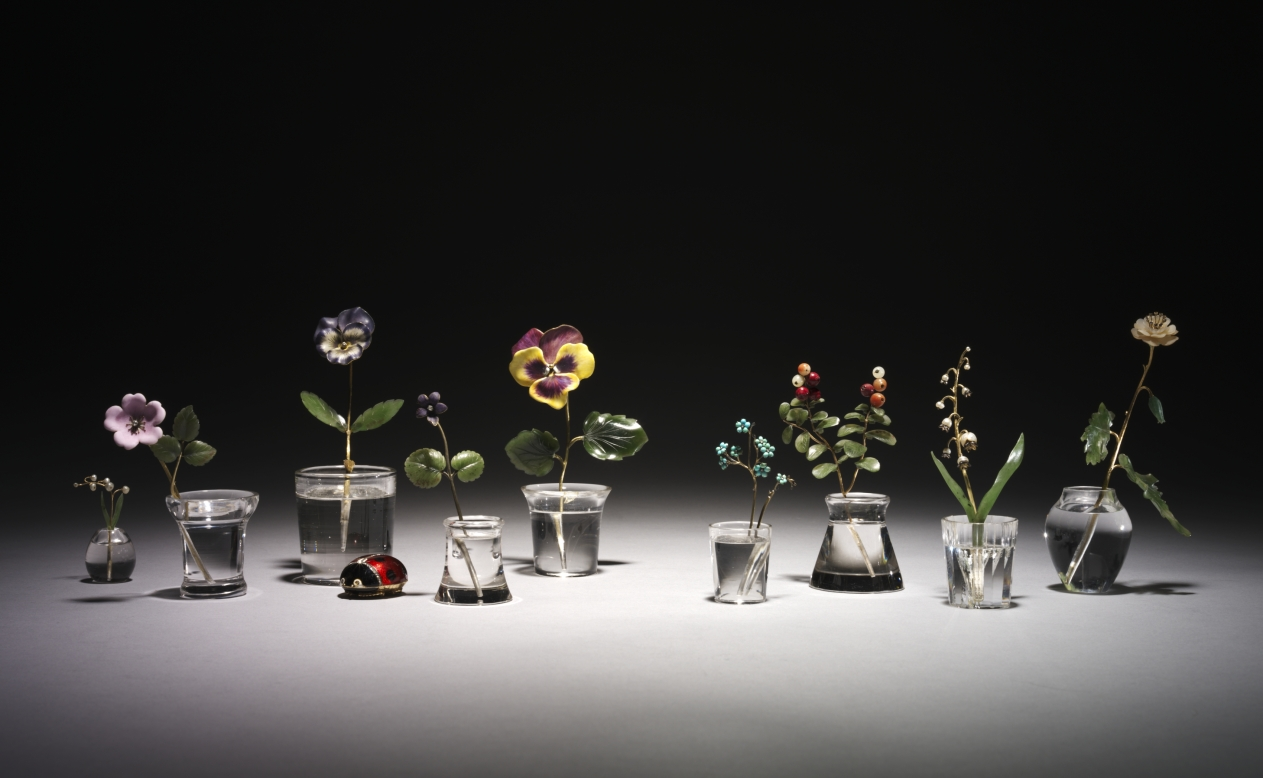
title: Flower Study of a Violet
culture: Russia, St. Petersburg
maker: House of Fabergé (Russian, 1842–1918)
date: c. 1885–1915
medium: enamel, silver gilt, jade, diamond, rock crystal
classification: Miscellaneous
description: This flower study depicts a single stem of violet. Fabergé’s inspiration for his flower studies is said to have come from the floral brooches of precious stones that were made in the 1700s for Catherine the Great as well as from the Japanese art of flower arranging, known as ikebana. Small and delicate, Fabergé’s flower studies were given as intimate gifts to friends by the tsarina and others in the court. She also liked to take them around to wherever the imperial family was residing as a reminder of spring during the harsh Russian winters.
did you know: The stems of Fabergé’s flower studies are set into little basins carved from rock crystal to resemble pots of water.